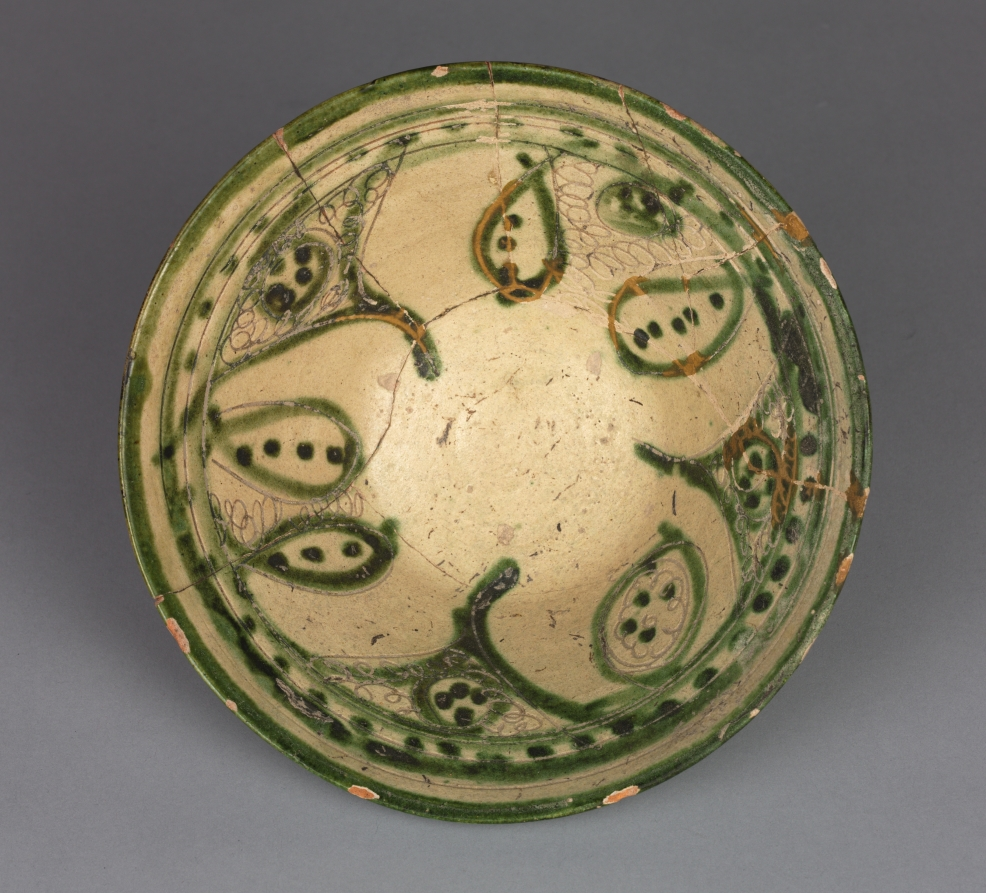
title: Bowl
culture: Iran, Amul, 11th-12th century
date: 1000s-1100s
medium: earthenware with underglaze slip-painted decoration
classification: Ceramic